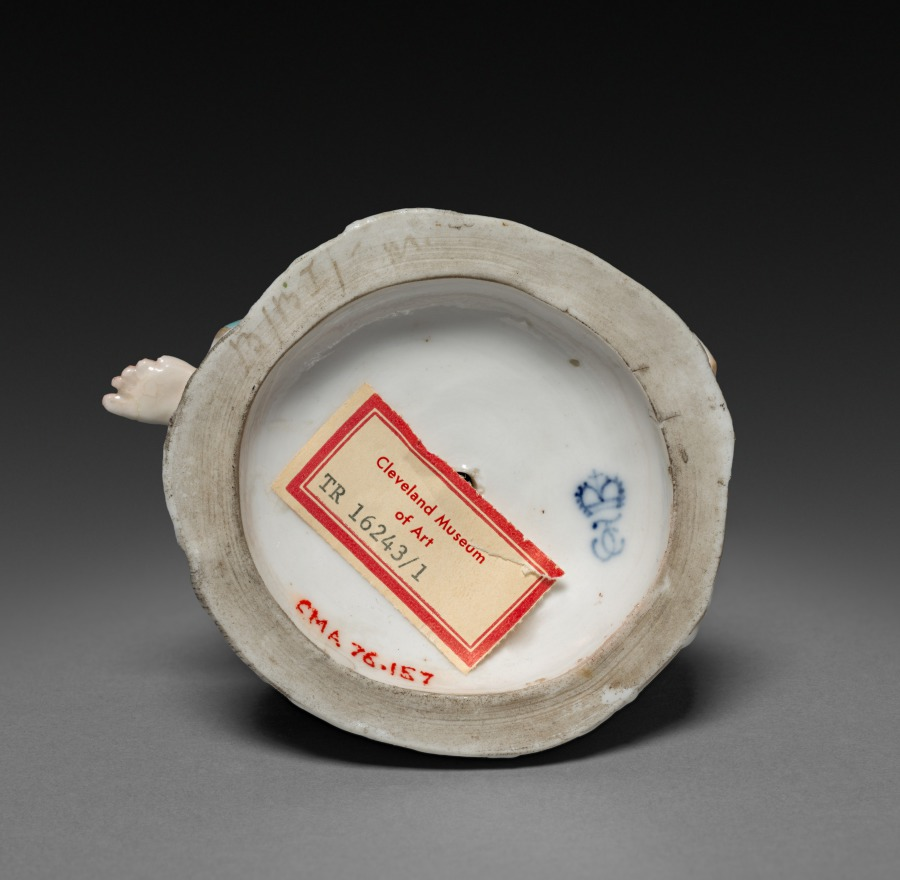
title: Girl Musician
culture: Germany, 18th century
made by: Frankenthal Porcelain Factory (German)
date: c. 1770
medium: porcelain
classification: Ceramic